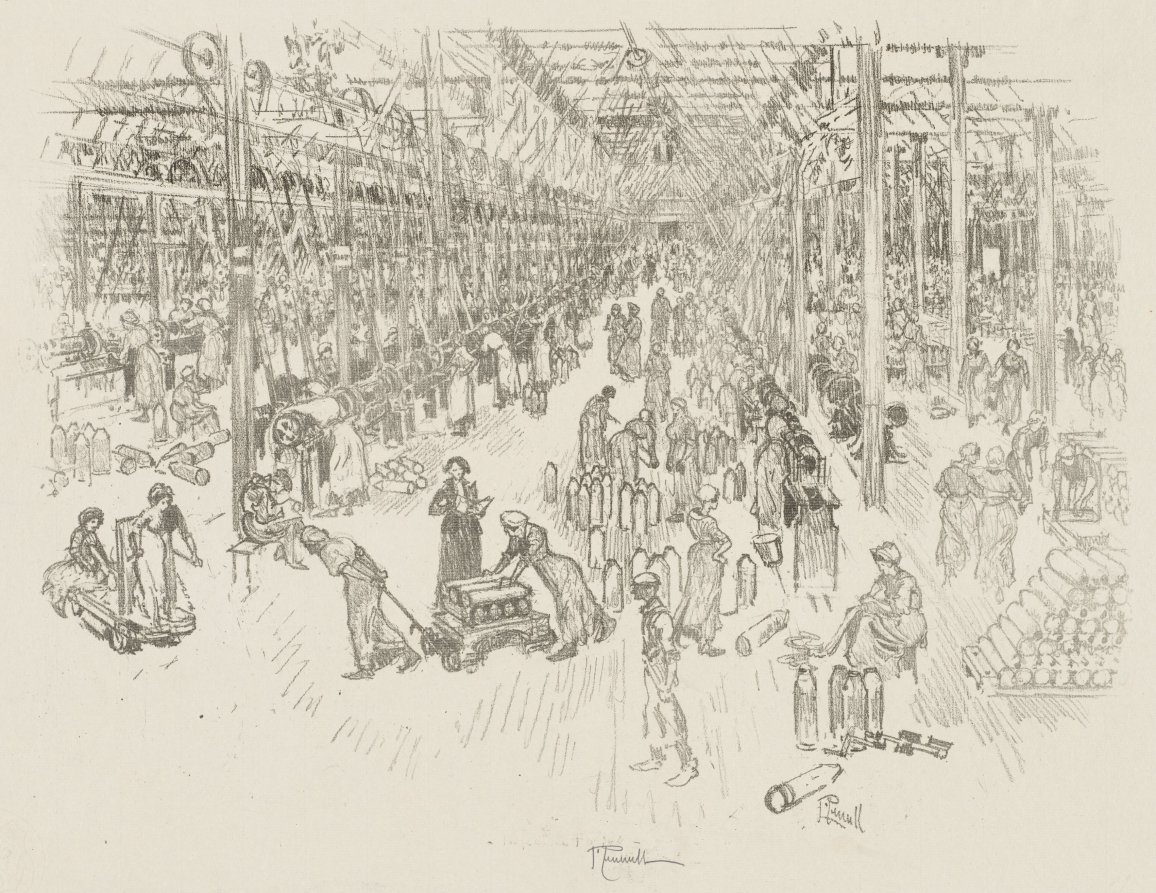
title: English War Work: The Bay of the Thousand Girls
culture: America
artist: Joseph Pennell (American, 1857–1926)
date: 1916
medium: lithograph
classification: Print